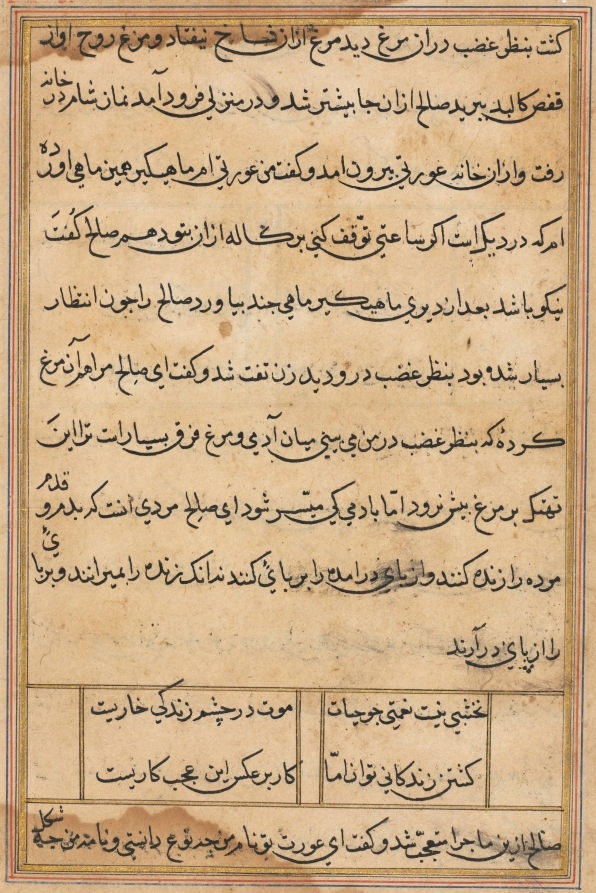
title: Page from Tales of a Parrot (Tuti-nama): text page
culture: Mughal India, court of Akbar (reigned 1556–1605)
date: c. 1560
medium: gum tempera, ink, and gold on paper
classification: Painting